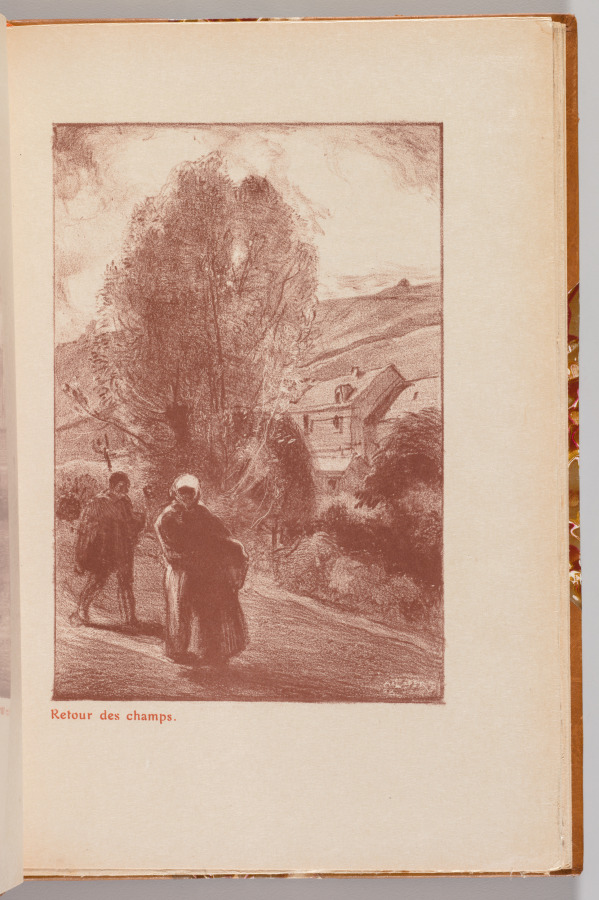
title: Catalogue de L'Exposition de Auguste Lepère: Return from the Fields (Auguste Lepère: Retour des champs)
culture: France, 20th century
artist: Auguste Louis Lepère (French, 1849–1918)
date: 1908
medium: Lithograph with remarque, from leather-bound volume containing two etchings and one lithograph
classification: Bound Volume